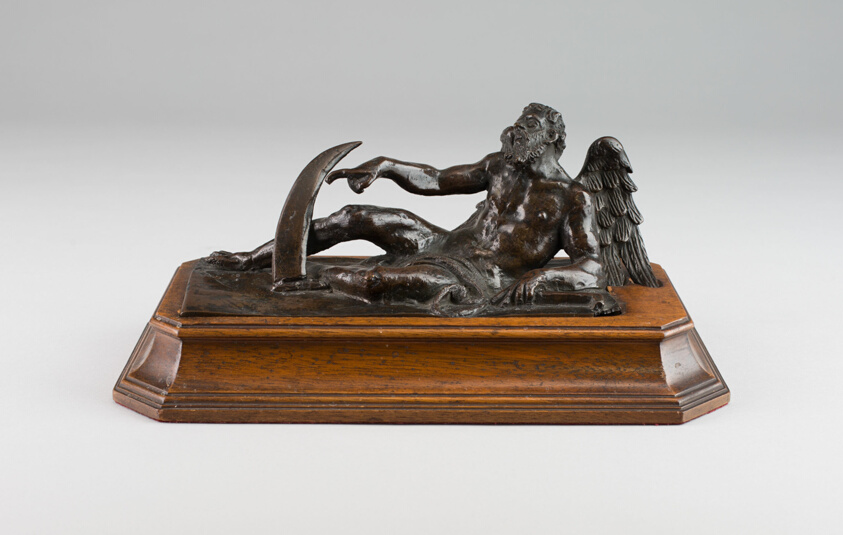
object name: Sculpture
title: Father Time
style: sixteenth century, 16th Century, 17th Century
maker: Italian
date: 1500/1600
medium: Bronze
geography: Italy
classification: statuette; sculpture; bronze; Italian; metal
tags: time, weapons, bearded man, figure, man, nudes, wings